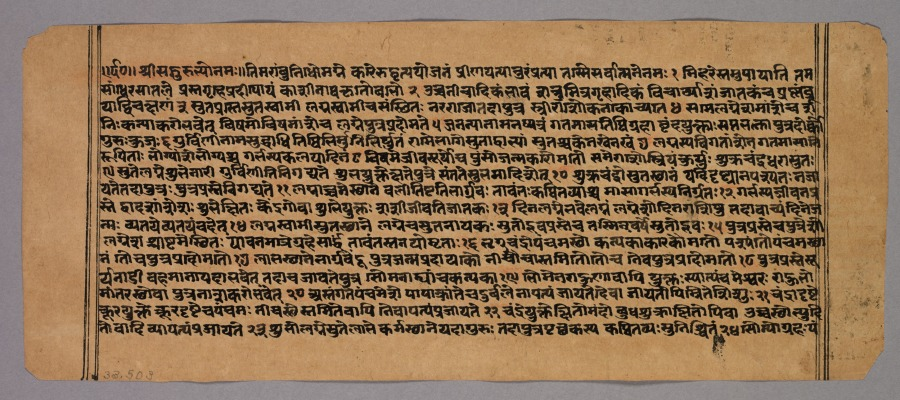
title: Page from the Prasnapradipa, a Hindu Astrology Text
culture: Western India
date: c. 1700s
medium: ink on paper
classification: Manuscript